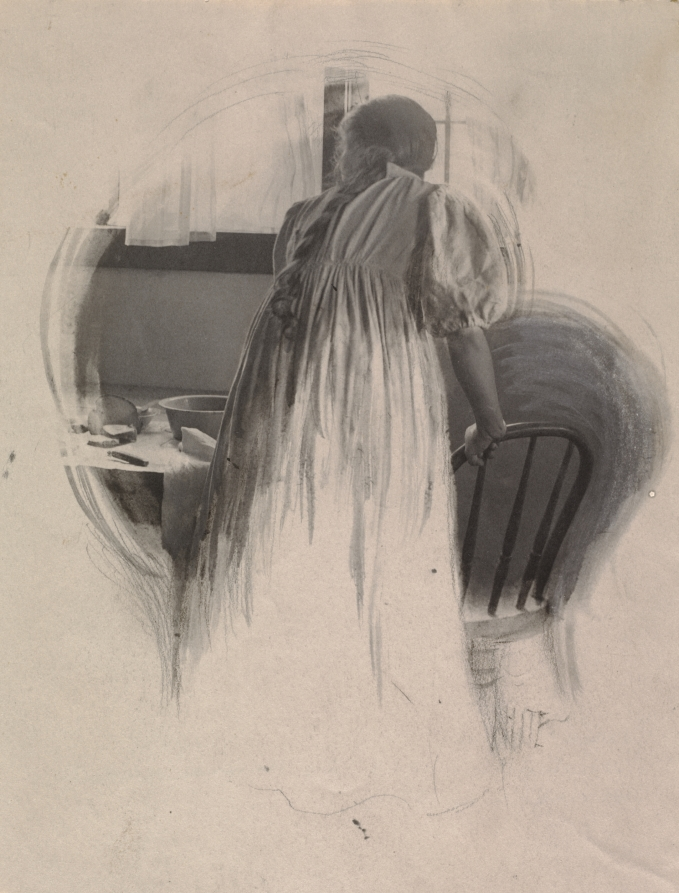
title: Unpublished illustration [Julia Hall McCune] for Clara Morris, "Beneath the Wrinkle"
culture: America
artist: Clarence H. White (American, 1871–1925)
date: 1903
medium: platinum print with glycerine development, graphite, crayon, and gouache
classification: Photograph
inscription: Written in pencil on recto of photo: "White"; in pencil on recto of mounting tissue: "Clarence H. White [signed] '03"; in pencil on verso of mount: "34 [circled]"; "Illustration by / Clarence H. White"; in pencil on verso of photograph: "Julia McCune / illustration 1903 by Clarence H. White / for magazine story."